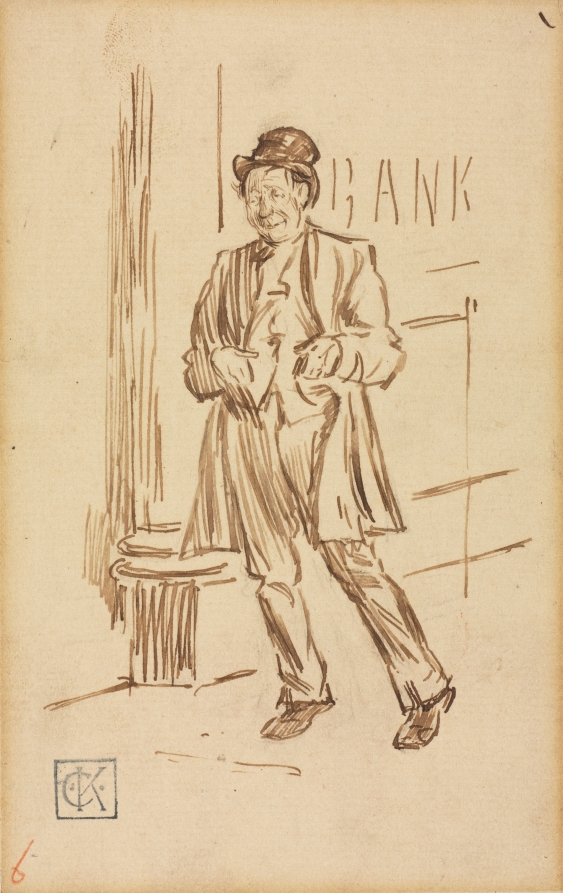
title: Study of a Drunken Man Passing a Bank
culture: England, 19th century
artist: Charles Samuel Keene (British, 1823–1891)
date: c. 1851–91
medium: pen and ink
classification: Drawing